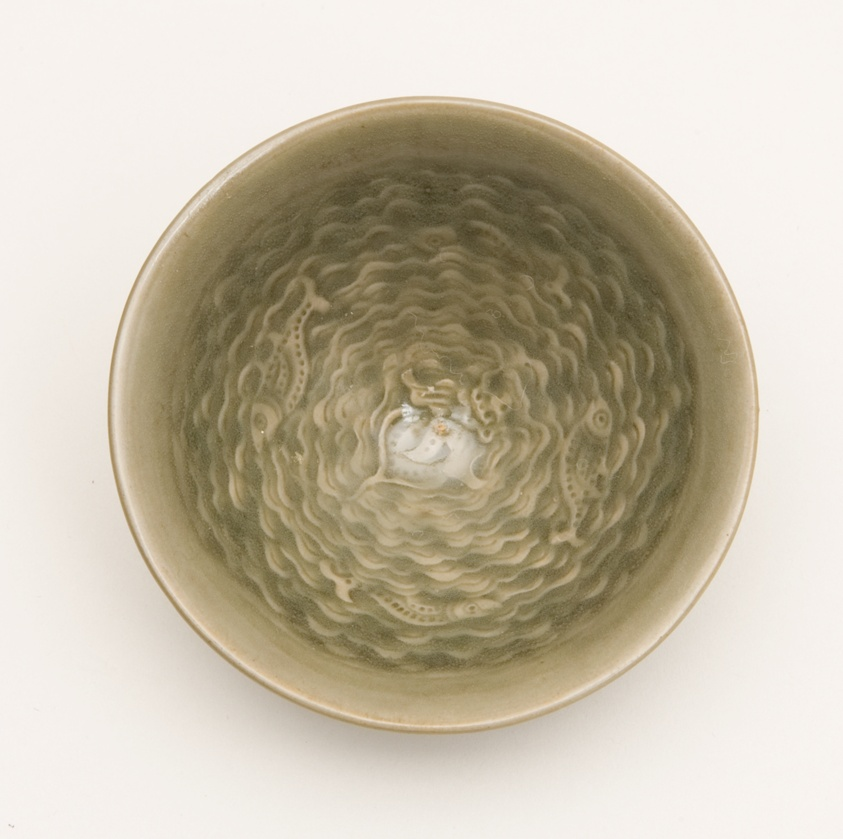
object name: Vessel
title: Conical Bowl with Interior of Fish Swimming amid Waves Encircling a Sea Crab and Exterior of Stylized Petals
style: Chinese (culture or style)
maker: China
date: Jin dynasty (1115–1234), 12th century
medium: Yaozhou ware; stoneware with underglaze molded and carved decoration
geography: China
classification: bowl; dish (vessel); vessel